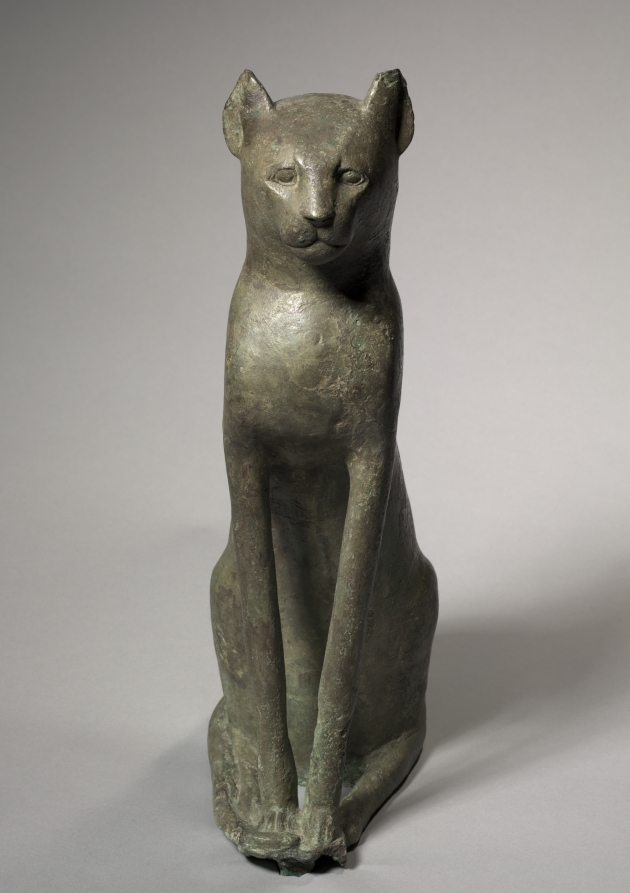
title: Cat Coffin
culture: Egypt, Greco-Roman period (332 BCE–395 CE), Ptolemaic dynasty (305–30 BCE)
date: 305–30 BCE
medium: bronze, hollow cast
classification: Funerary Equipment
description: Although the cat is considered the most Egyptian of animals, as an object of worship the cat does not appear until late in Egyptian history. This unusually large statue of a cat was made to hold the mummified remains of a sacred cat. The coffin is, of course, hollow, with an open bottom. As usual, the animal’s tail is curled around its right side.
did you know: A necklace appears to have been incised or scratched into the finished bronze; faint traces are visible on the chest.